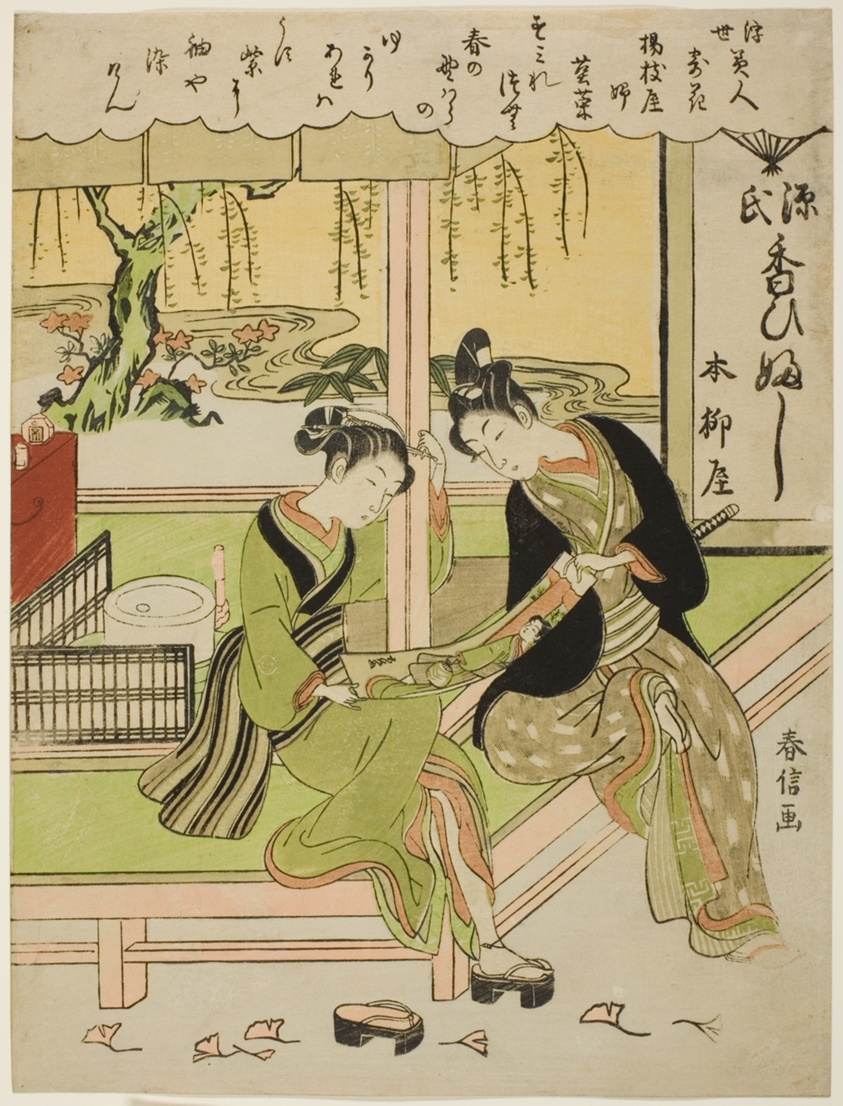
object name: Print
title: Sumirena: The Mistress of Yojiya (Yojiya musume, Sumirena), from the series "Beauties of the Floating World Compared to Flowers (Ukiyo bijin hana ni yosu)"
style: Japanese (culture or style)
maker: Suzuki Harunobu 鈴木 春信; Japanese, 1725 (?)-1770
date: c. 1768/69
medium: Color woodblock print; chuban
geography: Japan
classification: woodblock print; print; asian art